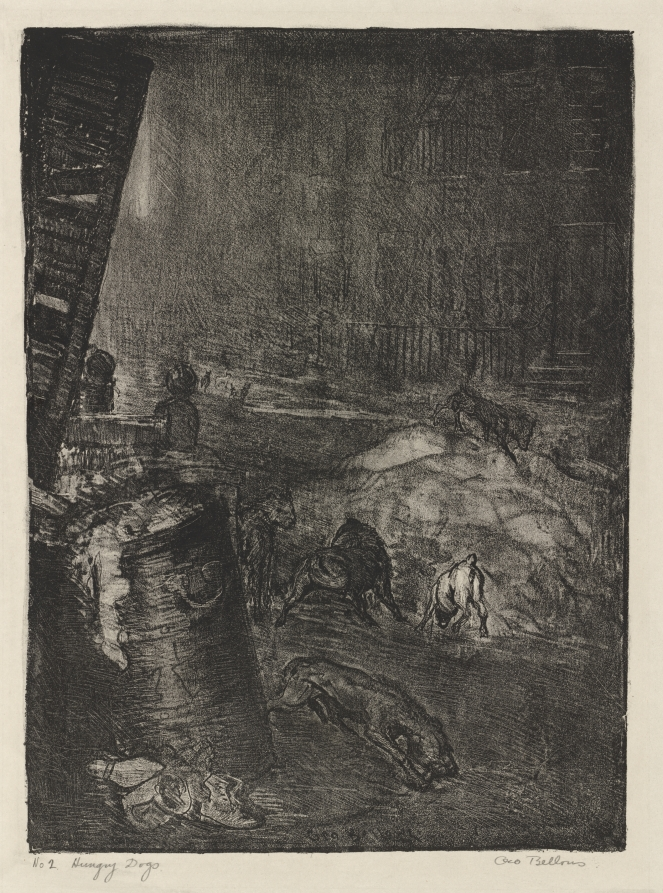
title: Hungry Dogs, Second Stone, second state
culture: America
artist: George Bellows (American, 1882–1925)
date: 1916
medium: lithograph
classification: Print